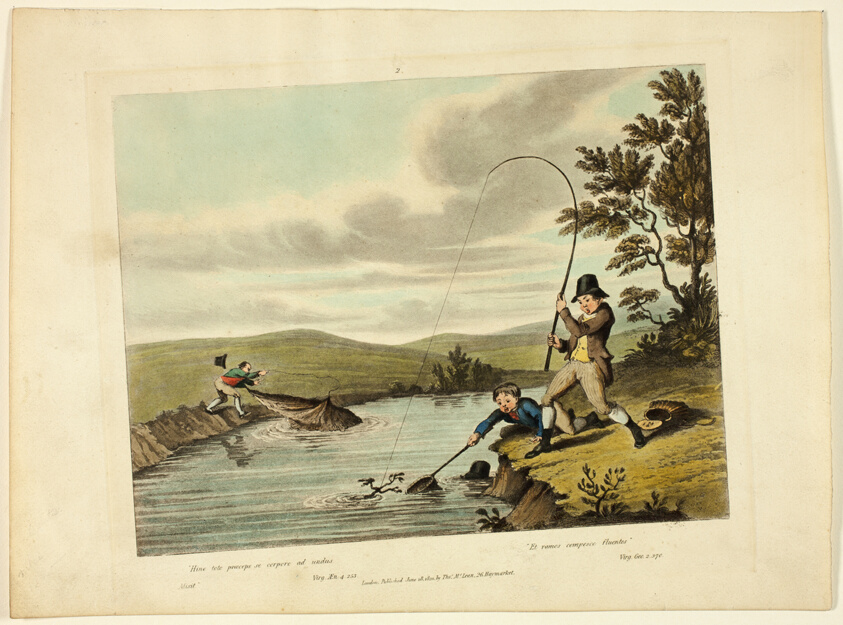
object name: Print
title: Delights of Fishing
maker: Charles Turner (English, 1773-1857); after Sir Robert Frankland (English, 1784-1849); published by Thomas McLean (English, active c. 1790-1860)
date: 1823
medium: Hand-colored etching and aquatint on ivory wove paper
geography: England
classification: aquatint; print; prints and drawing